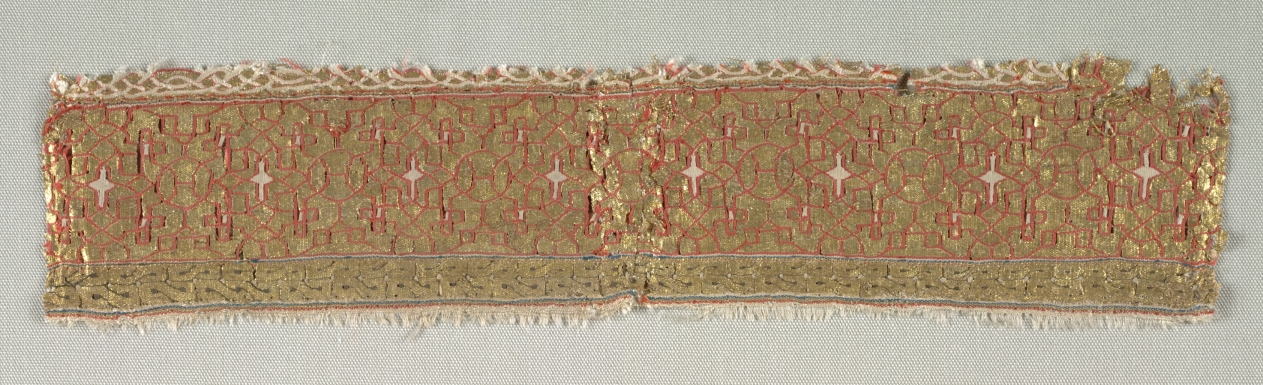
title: Guilloche band, from a dalmatic of San Valero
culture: Spain, probably Almeria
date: 1200s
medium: tapestry weave: silk and gold thread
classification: Textile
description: Rarely do medieval silks convey their original luxurious quality with such brilliant gold thread. This fragment is said to have been among relics of Saint Valerio from Lérida Cathedral (in northeast Spain, near Barcelona). An elegant geometric tracery in crimson silk decorates the gold-thread ground, bordered above by four interlacing strands in ivory silk and below by two rows of "figure 8s" woven with gold thread and black silk outlines.